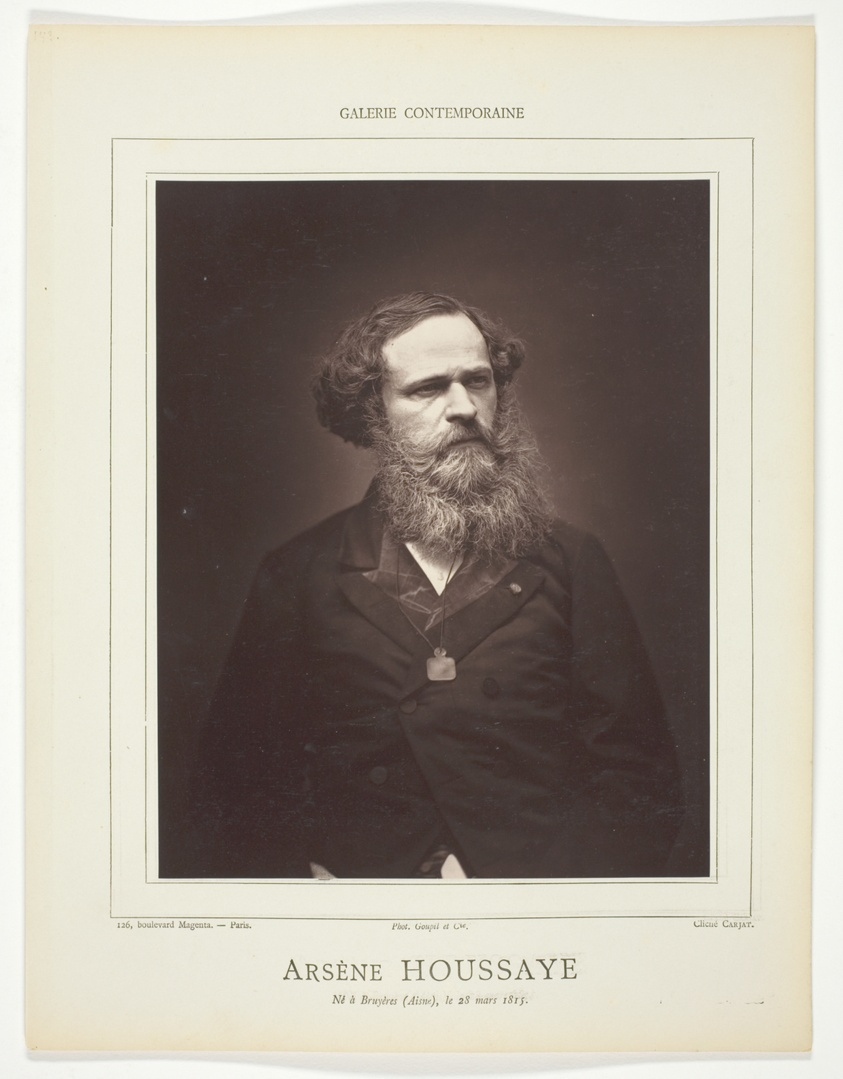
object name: Photograph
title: Arsène Houssaye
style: 19th century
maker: Etienne Carjat (French, 1828–1906)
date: c. 1876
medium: Woodburytype, from the periodical “Galerie Contemporaine Littéraire, Artistique” (1878), volume 6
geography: France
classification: woodburytype; photomechanical process; photography; photograph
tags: Collected by Hugh Edwards, Contemporaine Littéraire